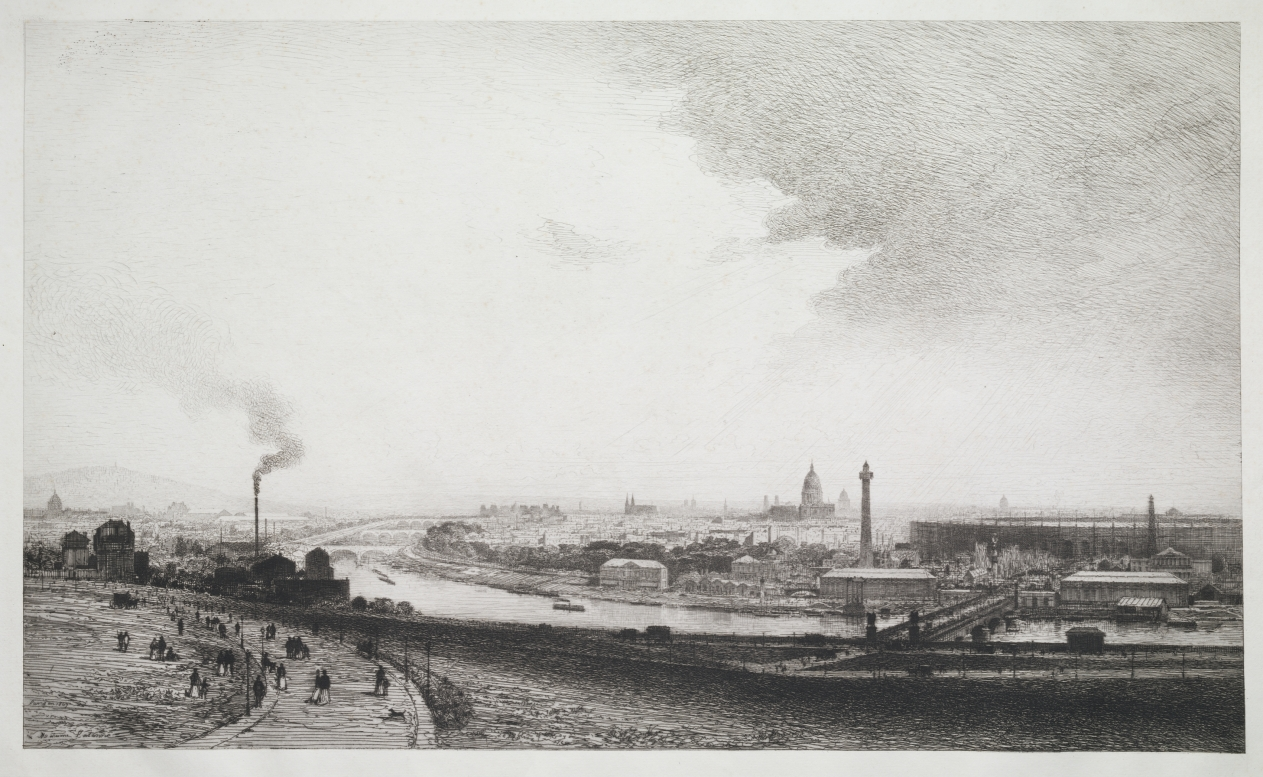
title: Paris in 1867, View from the Trocadero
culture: France, 19th century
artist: Maxime Lalanne (French, 1827–1886)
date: 1867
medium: etching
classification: Print